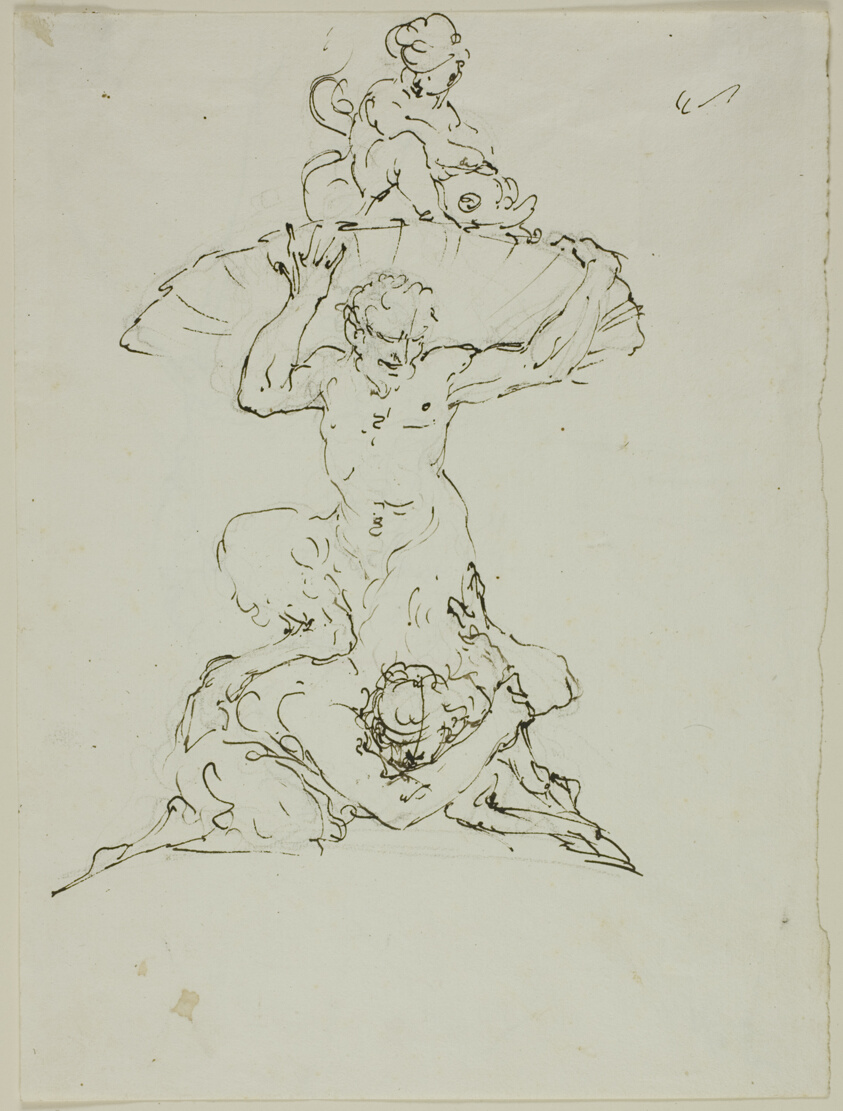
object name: Drawing and Watercolor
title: Fountain with Satyr and Putto (recto); Punchinello (verso)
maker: Unknown artist; Italian or French, 18th century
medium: Pen and brown ink, over graphite (recto), and graphite (verso), on ivory laid paper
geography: Italy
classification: pen and ink drawings; drawings (visual works); prints and drawing